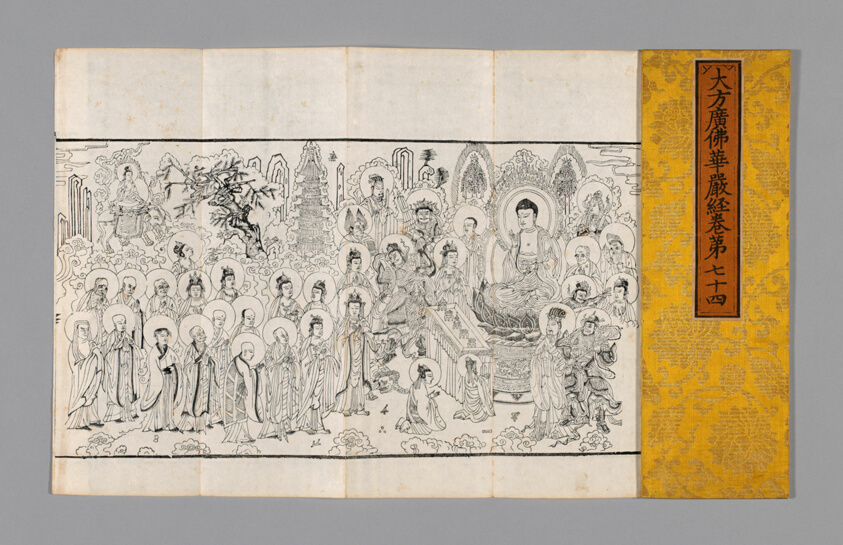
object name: Textile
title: Sutra Cover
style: ming, Chinese (culture or style), East Asian, asian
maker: China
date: Ming dynasty (1368–1644), c. 1590's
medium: Silk and gold-leaf-over-lacquered-paper strips, satin weave with patterning wefts; wrapped over cardboard and backed with paper; applied label of silk, plain weave; with inscribed title painted and/or printed with ink; sutra, accordion-mounted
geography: China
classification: textile; weaving